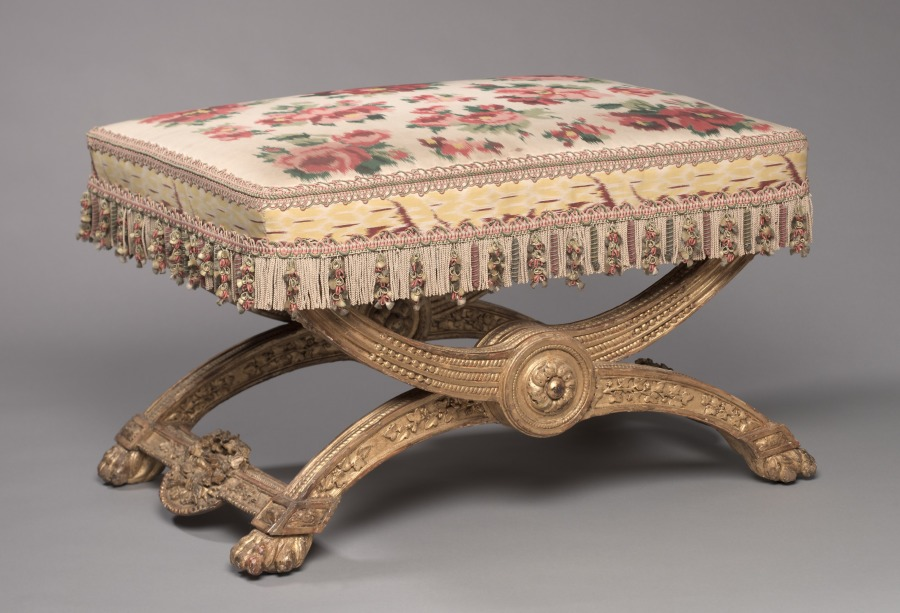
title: Stool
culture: France, 18th century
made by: Jean-Baptiste-Claude Sené (French, 1748–1803)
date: 1786–1787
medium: carved and gilded wood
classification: Furniture and woodwork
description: These stools were made for the gaming room of Marie-Antoinette at the Chateau de Compiègne and later placed in the Chateau de Fontainbleau.